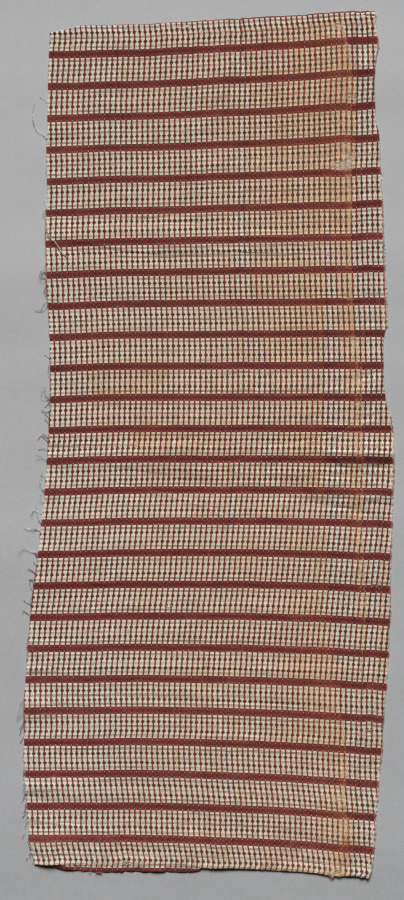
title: Roller Printed Cotton Textile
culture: America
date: 19th century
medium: plain cloth, roller printed: cotton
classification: Textile